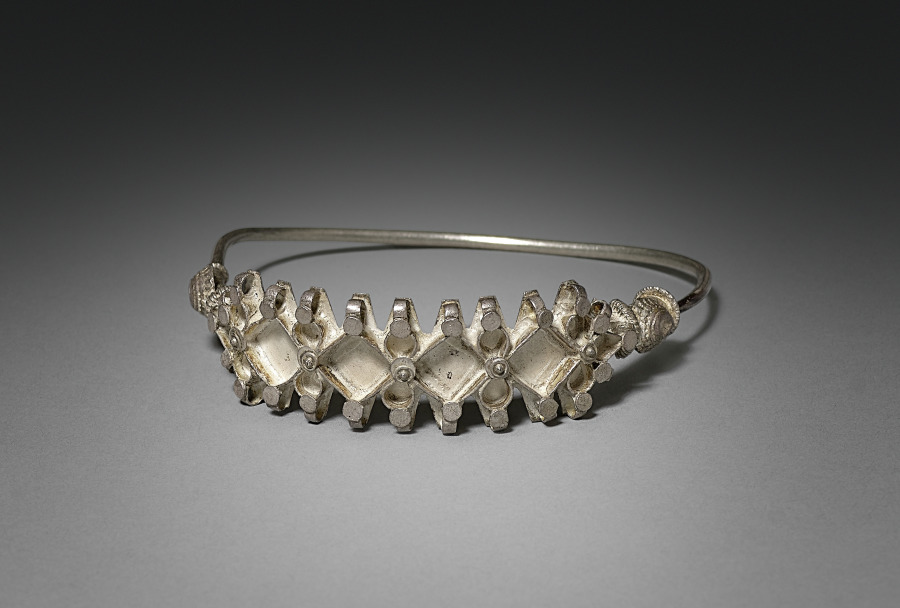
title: Nose Ring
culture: India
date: early 1900s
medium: silver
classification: Jewelry